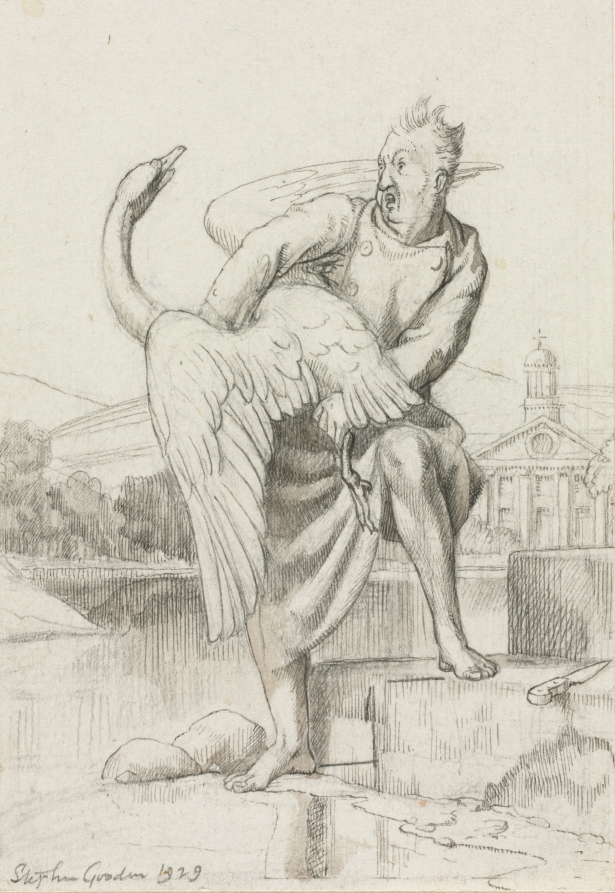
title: The Swan and the Cook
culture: England, 20th century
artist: Stephen Gooden (British, 1892–1955)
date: 1929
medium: graphite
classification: Drawing